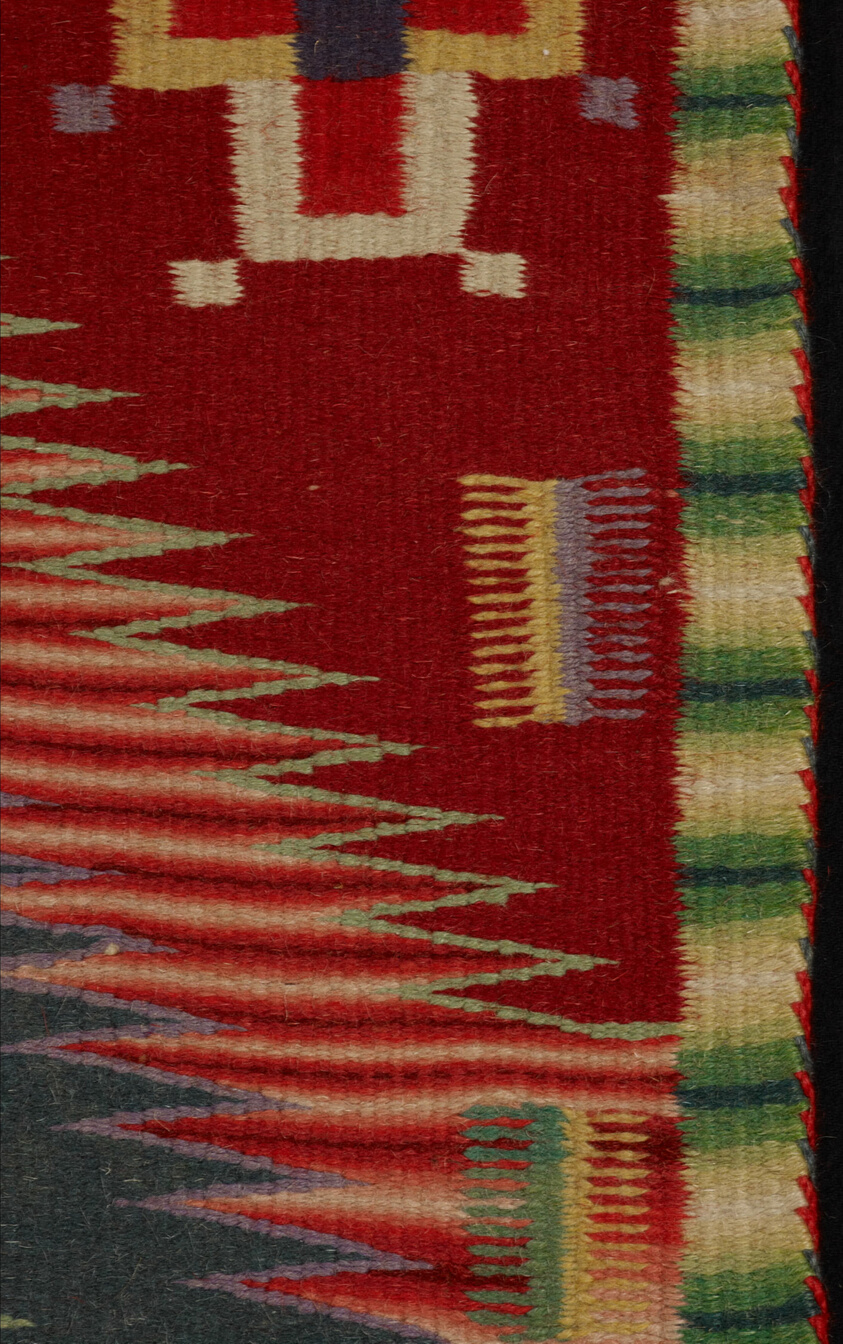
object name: Textile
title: "Eye-Dazzler" Weaving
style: navajo, native american, americas, Folk Art, 19th century, indigenous, north american, native north american, eye-dazzler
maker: Navajo (Diné) (Arizona, New Mexico, and Utah, United States)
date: 1880/1900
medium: Cotton and wool, single interlocking tapestry weave; twined selvages and heading, overcast finish terminating in tassels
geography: Navajo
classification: textile; weaving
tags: geometric, zigzags